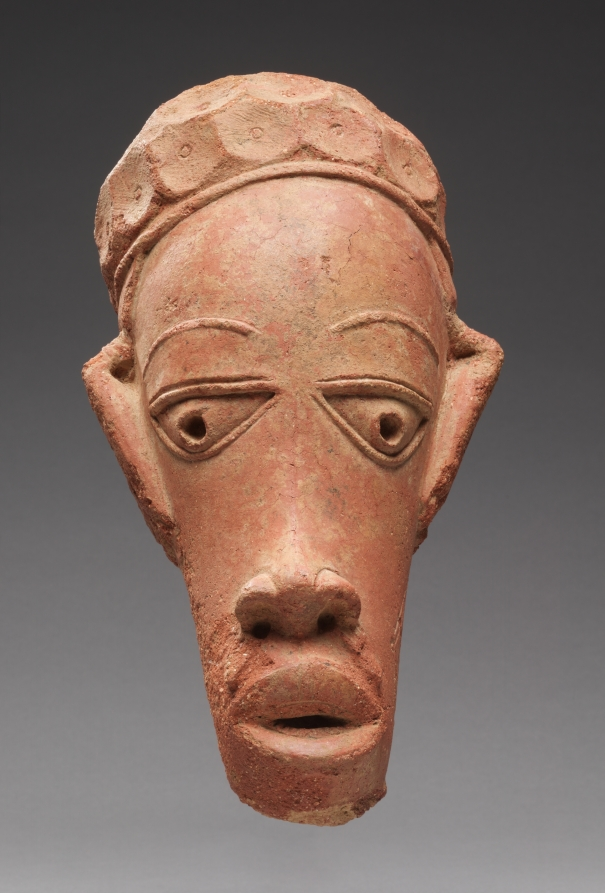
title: Head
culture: Africa, West Africa, Nigeria, Nok-culture style region, unknown female ceramicist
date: thermoluminescence date 20–620 CE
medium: terracotta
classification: Sculpture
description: More than 500 such sculptures—often full figures with elaborate hairstyles and jewelry— have been found in central Nigeria. Named after a discovery site, Nok culture (500 BCE–200 CE or 1500–1 BCE) produced the earliest large figurative artworks in Africa outside of Egypt. Little was known about their social context, as they were first found in mining deposits in the 1920s. Archaeological excavations conducted in the 2000s by a German-Nigerian team suggest that many sculptures were deliberately broken and placed under pavements and in pits, indicating ritual practice. Male-centered art histories presumed men made these figurative sculptures; however, they incorporate building and firing techniques practiced only by women.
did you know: This complete head’s bold modeling, deliberate asymmetry, and sensitive expression make it one of the finest known examples of Nok sculpture.